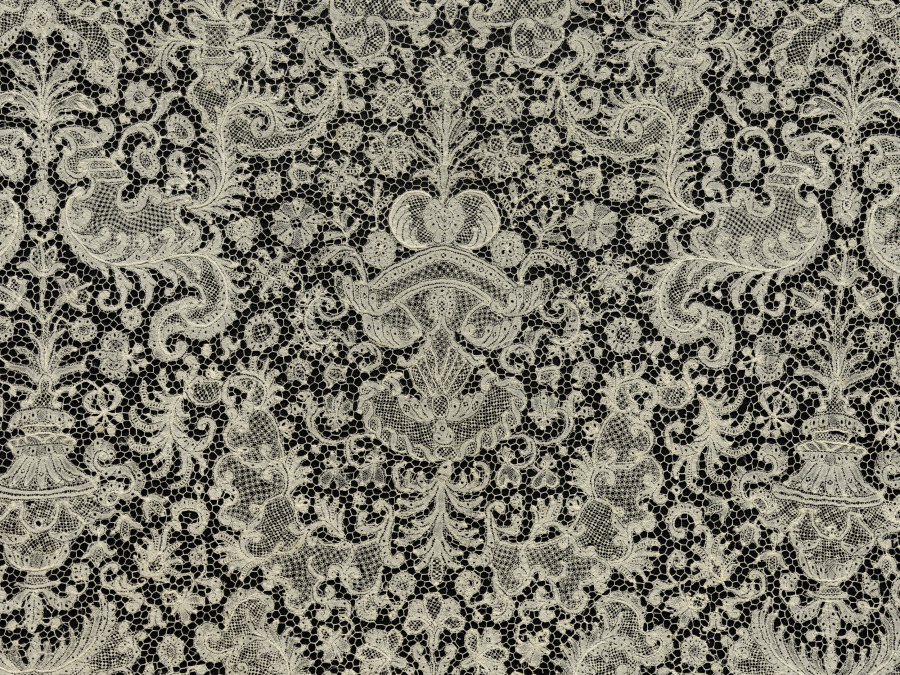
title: Lace Jabot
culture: Flanders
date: 1700–1720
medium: Bobbin lace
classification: Lace